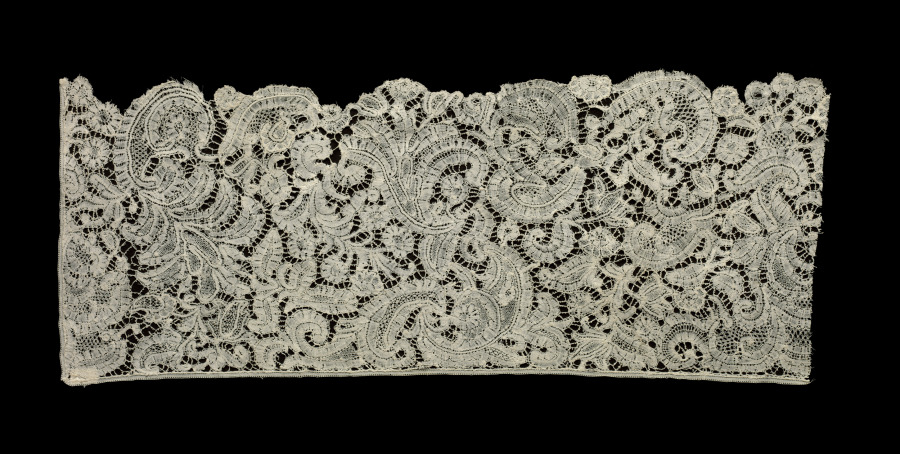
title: Lace Edging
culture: Flanders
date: 1700s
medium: Linen: bobbin lace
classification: Lace